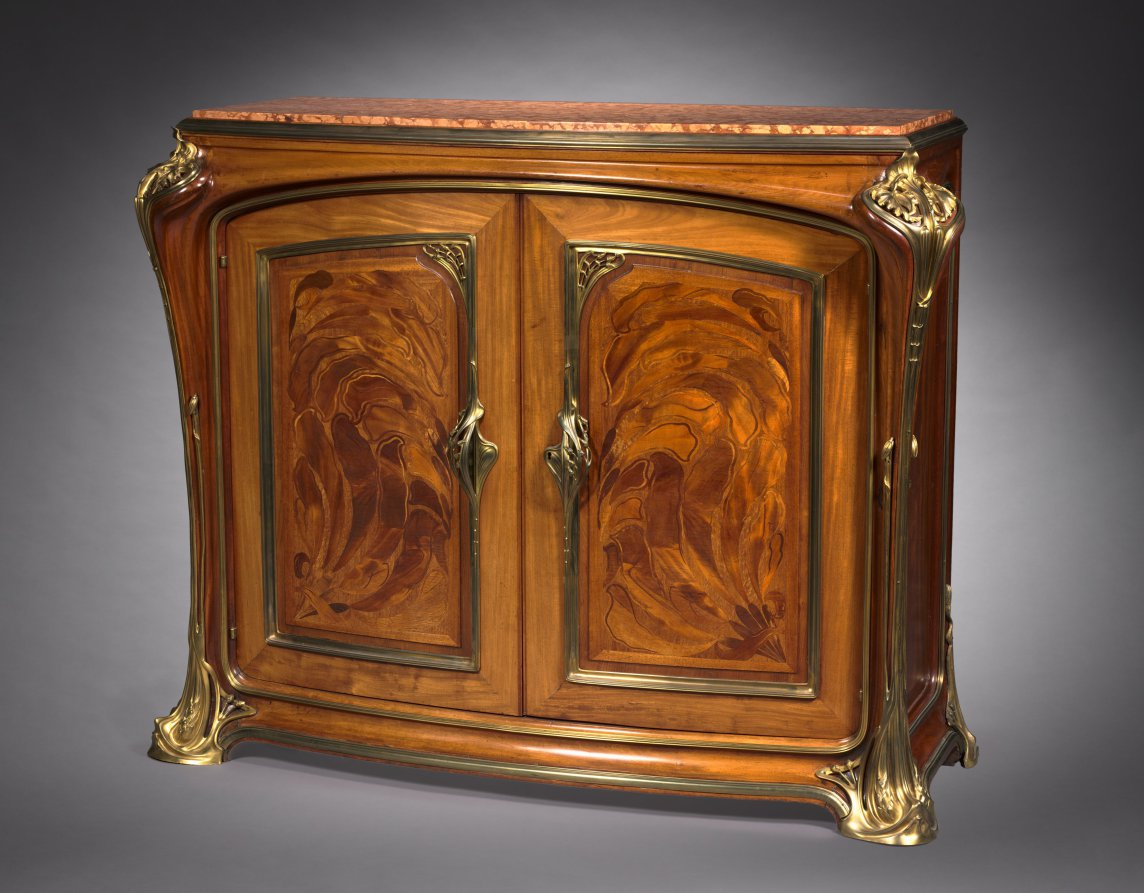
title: Cabinet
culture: France, early 20th Century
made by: Louis Majorelle (French, 1859–1926)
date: c. 1910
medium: wood marquetry with metal mounts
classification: Furniture and woodwork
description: The Majorelle family operated a large furniture making business at Nancy in eastern France. There they produced distinguished furniture in the Art Nouveau style. That style is well illustrated in the curvilinear, abstract wood marquetry (an inlaid, veneered pattern) on the doors of this cabinet.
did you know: Let your eye trace the sinuous lines and leafy forms of this chest. Its design emphasizes the beauty of the wood, celebrating nature. Louis Majorelle designed it in the Art Nouveau style.